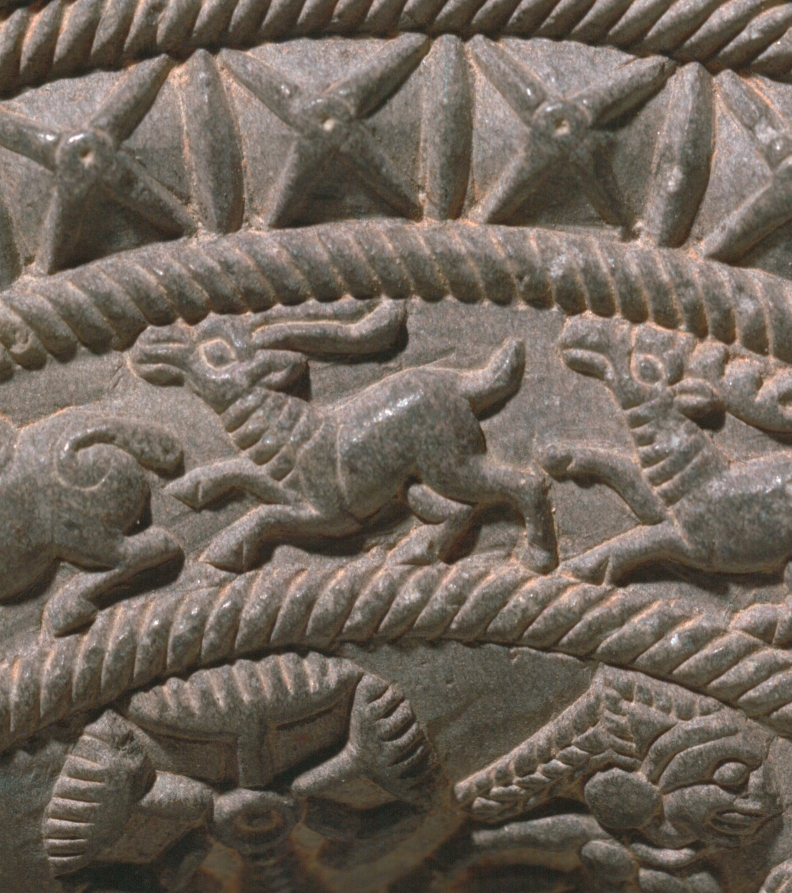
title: Ringstone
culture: India, Maurya period (322–185 BCE)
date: 200s BCE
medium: steatite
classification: Sculpture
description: Ringstones are among the earliest works of art to be created in stone during India's historical period. This example is finely carved with detailed images of affectionate couples and palm trees, running animals, and geometric motifs in concentric circles. The function of ringstones remains uncertain, since none of the surviving examples is inscribed or explained in a text.